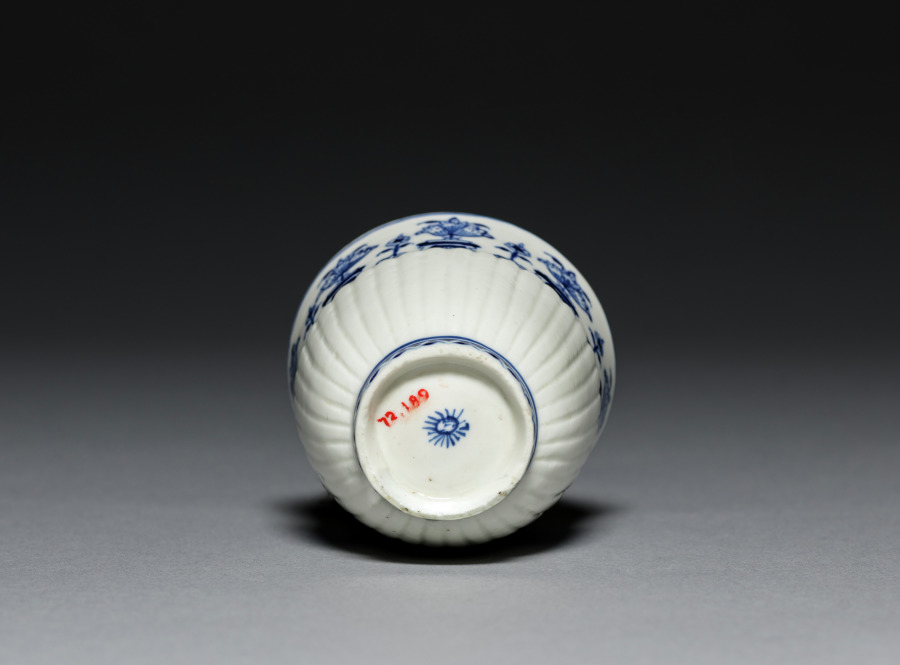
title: Cup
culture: France, Saint Cloud, 18th century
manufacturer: Saint Cloud Porcelain Factory (French)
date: c. 1720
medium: soft-paste porcelain with underglaze blue decoration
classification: Ceramic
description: The first extensive manufactory of soft-paste porcelain in France was carried out at a factory at Saint-Cloud, near Paris. The earliest porcelains were produced there in 1693, and the factory remained a significant one throughout the first half of the 18th century. Bacause of technical difficulties, most of the wares produced at Saint-Cloud are rather small in size and heavily potted. Stylistic restraint was exercised in both the form and decoration of its wares. Underglaze blue was frequently employed at Saint-Cloud, and pieces of the type resemble closely those attributed to Rouen, leading to the speculation that the two factories were closely related.